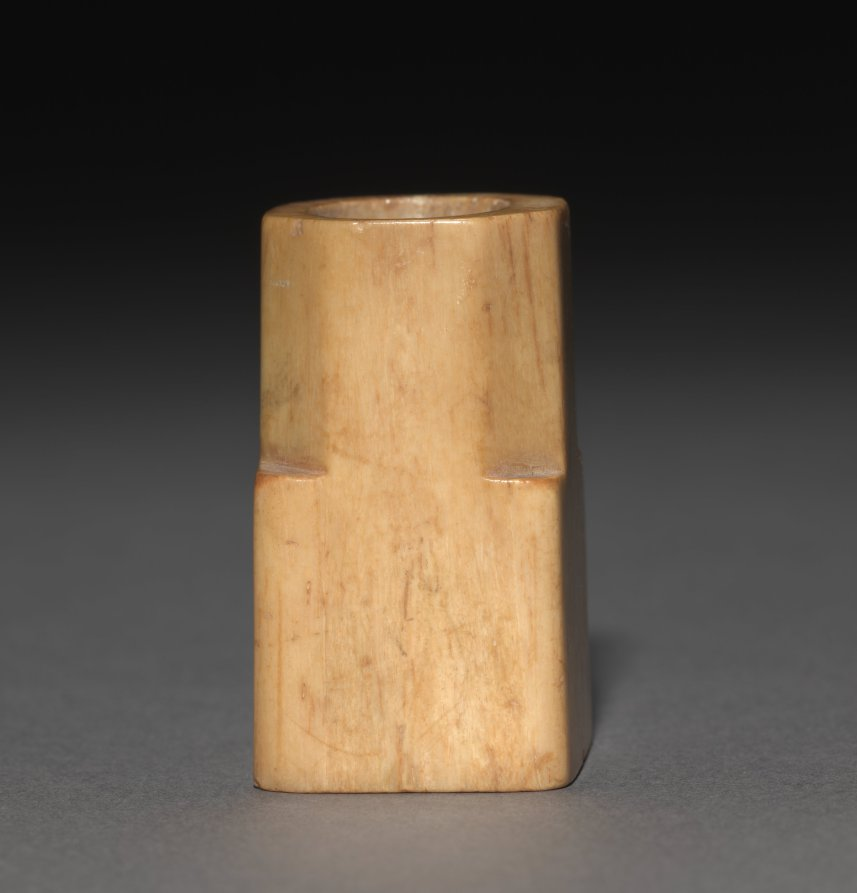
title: Carved Bone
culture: Parthian Empire (247 BCE–224 CE)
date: 1–200 CE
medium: carved bone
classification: Miscellaneous